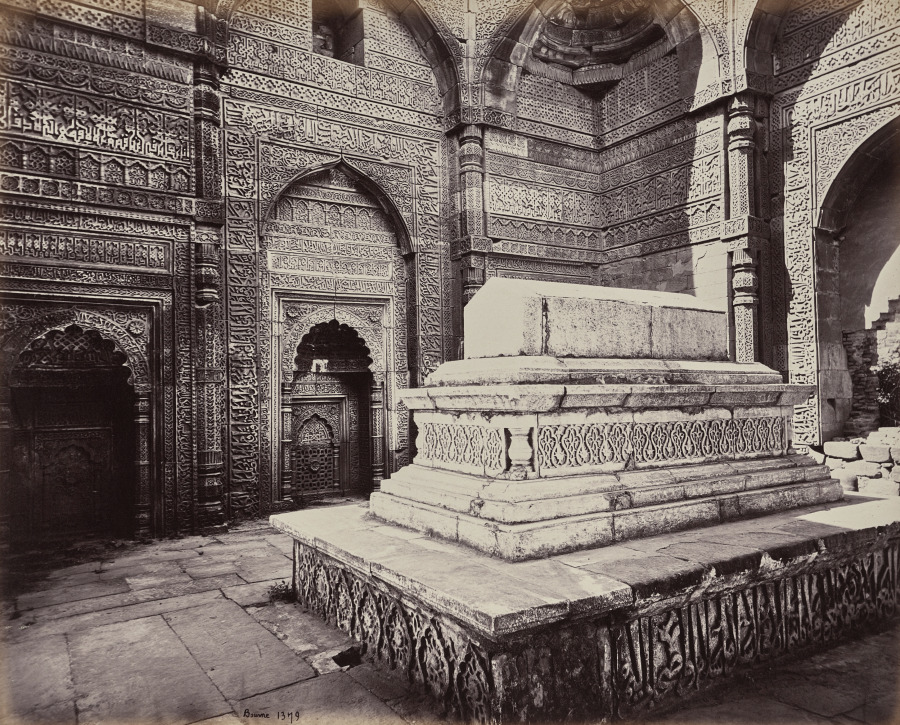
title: Delhi. Tomb of the Emperor Shums ooo deen Allomsh, Builder of the Kootub Minar in the Ruins of Old Delhi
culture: England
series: Photographs of Northern India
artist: Samuel Bourne (British, 1834–1912)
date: 1863–70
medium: albumen print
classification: Photograph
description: The 50 images in this album, all taken in the 1860s, move from the hill towns of the Himalayas down to cities including Lahore (now in Pakistan), Delhi, Lucknow, Agra, Benares (now Varansi), and Calcutta (now Kolkata). Architectural studies of major monuments offer valuable historical records of what sites such as the Taj Mahal and the imperial mosque of the Mughal emperors in Delhi looked like before 20th-century restorations.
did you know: Samuel Bourne, the author of most the images in this album, was a banker in England before he moved to India to become a professional photographer.